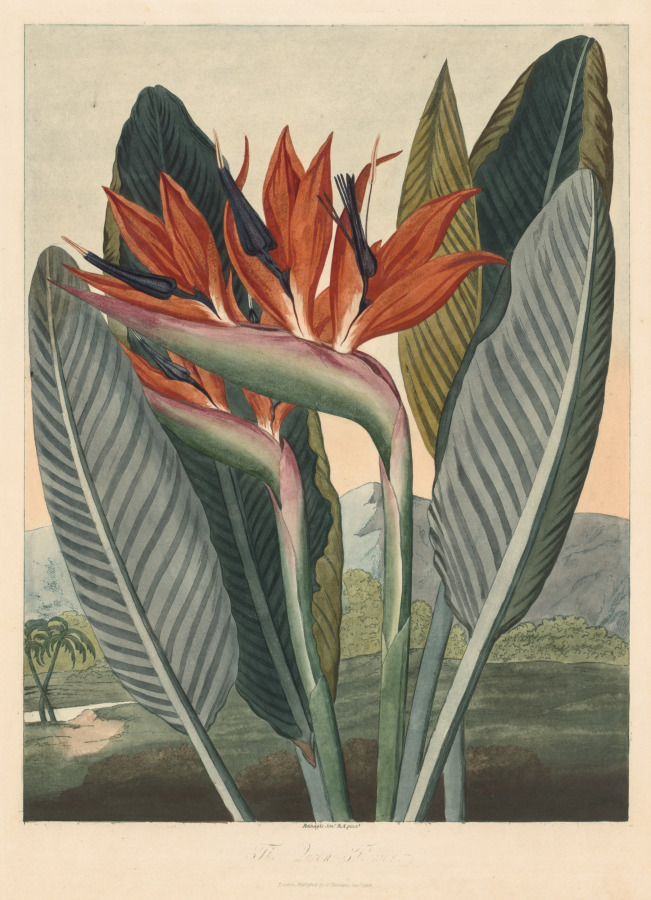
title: The Temple of Flora; or Garden of Nature: The Queen Flower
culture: England, Late 18th- Early 19th century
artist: Philip Reinagle (British, 1749–1833)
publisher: Dr. Thornton Jany. 1, 1812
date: 1812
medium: Etching and aquatint hand-colored with watercolor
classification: Print